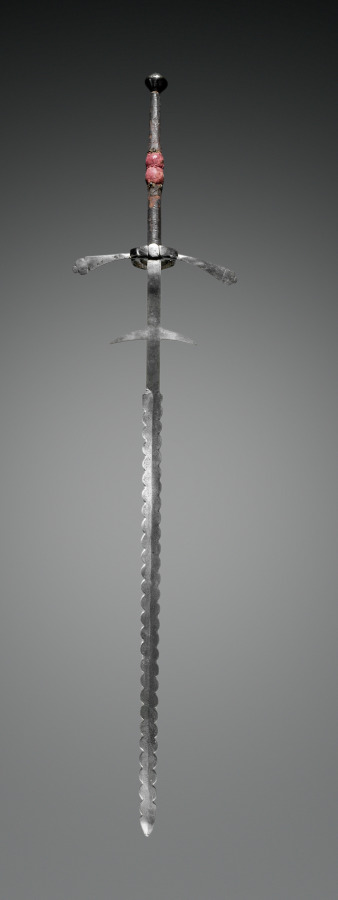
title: Two-Handed Sword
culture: Germany, second half of 16th Century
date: 1550–1600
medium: steel; leather and wood grip, cloth-covered middle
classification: Arms and Armor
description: The two-handed sword, originally a weapon of war for specialist infantry, is so named because two hands were required to wield it. By the late 1600s, these enormous swords assumed a largely ceremonial or bodyguard function.